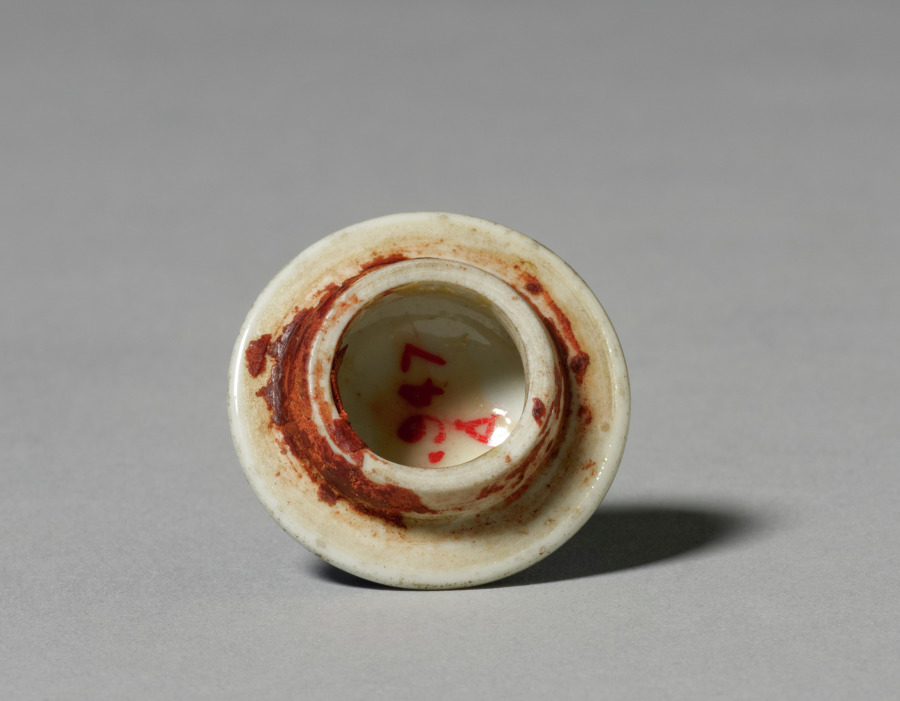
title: Jar with Cover (lid)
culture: China, Qing dynasty (1644-1911)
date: 19th Century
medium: porcelain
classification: Ceramic